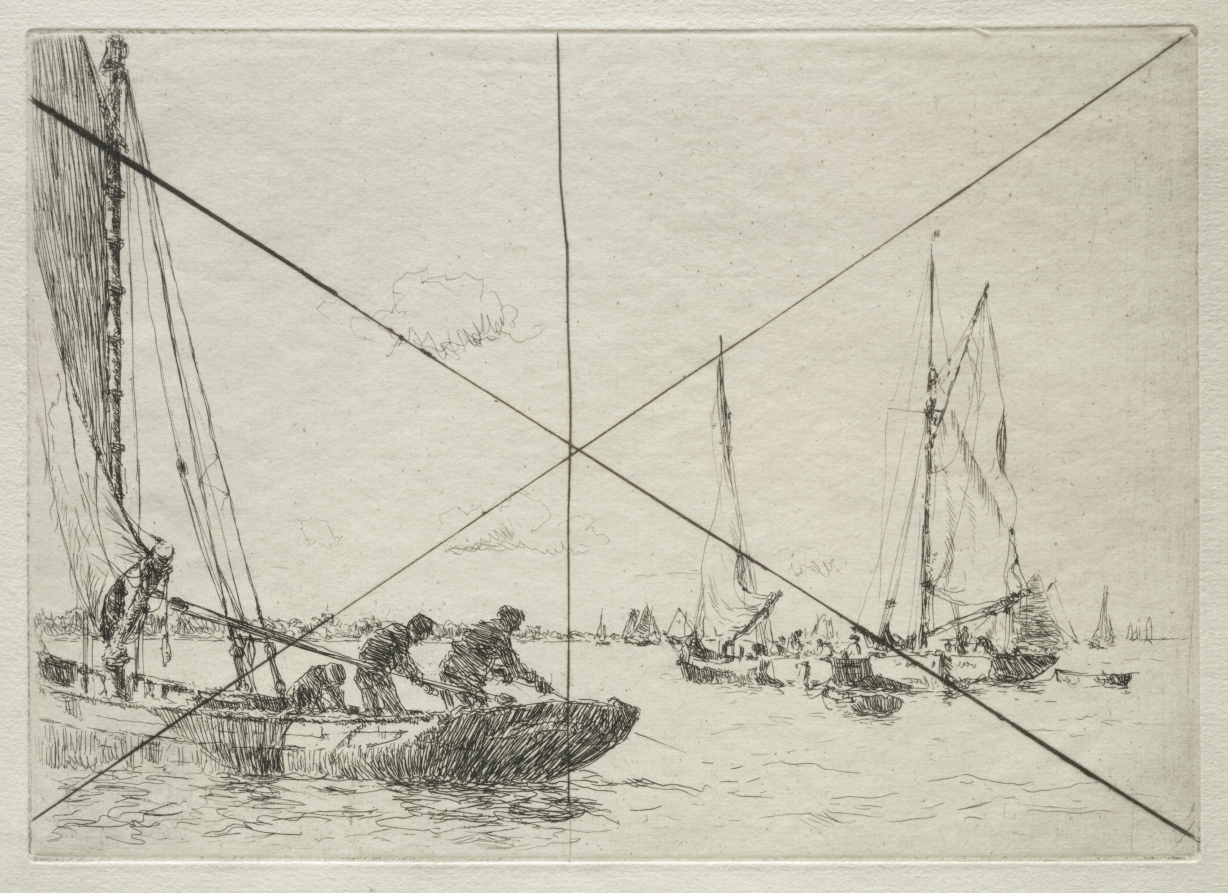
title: Oyster Dredging, West Mersea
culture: England, 20th century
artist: Arthur John Trevor Briscoe (British, 1873–1943)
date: c. 1900–1937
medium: etching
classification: Print